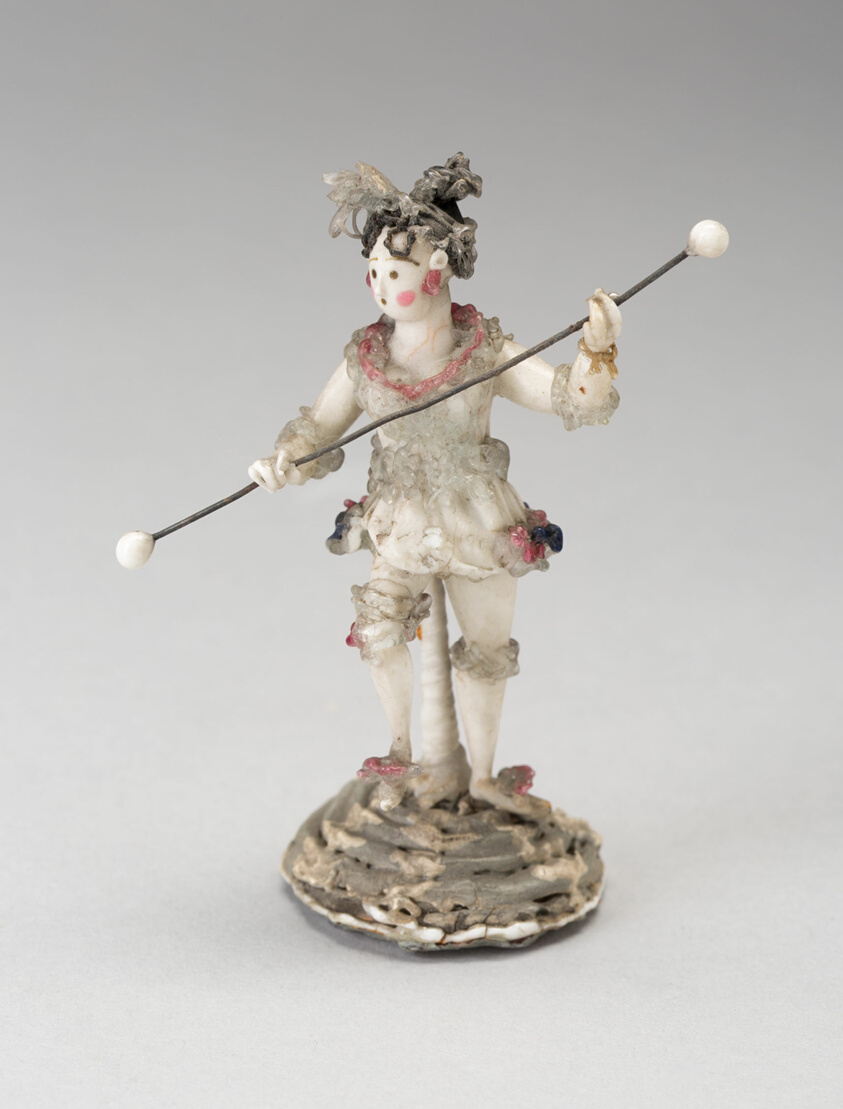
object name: Glass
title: Court Dancer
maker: Nevers, France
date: Early 18th century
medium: Glass; lampwork (verre de Nevers), metal armature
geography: France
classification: glass; miniature; decorative object/ornament; european decorative arts